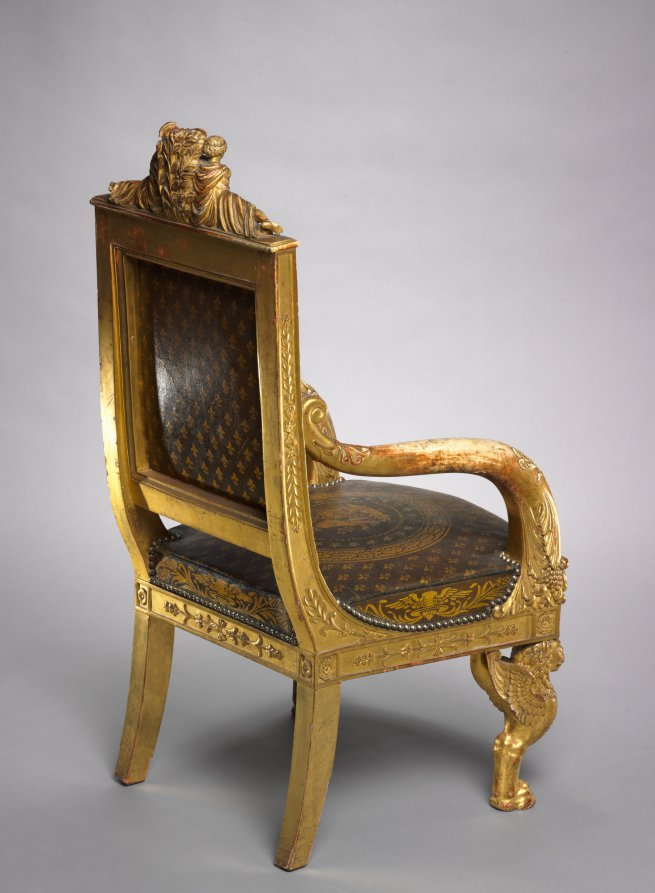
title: Child's Throne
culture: France, Paris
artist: Pierre-Marie Balny le Jeune (French, 1832)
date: 1822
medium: carved and gilded wood, leather upholstery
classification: Furniture and woodwork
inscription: inscribed with stencils inside back rail: BLONDEL TAPISSIER/RUE ST. ANTOINE N 72 1822 inscribed in ink lower edge back rail: 12 JANVIER 18[22?]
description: This chair was made for the young, presumed successor to the French throne who ruled briefly as Henri V in 1830, the last of the direct Bourbon line. He is depicted at the center of the top rail protected by female figures representing France and Minerva, the Roman goddess of wisdom. Fleurs-de-lis and the Gallic rooster, symbols of French royalty and the French people, decorate the upholstery.